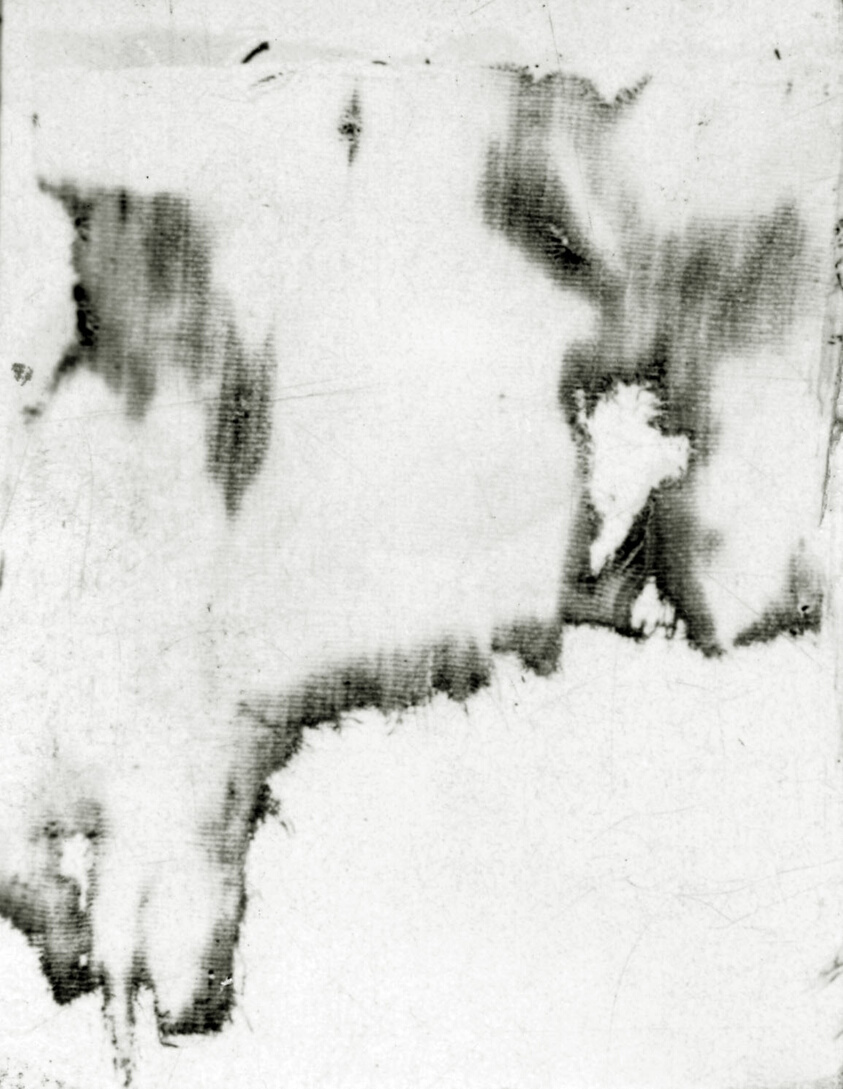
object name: Textile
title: Fragment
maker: Peru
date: 1–1532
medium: Plain simple cloth (old card)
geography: Peru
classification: textile; weaving